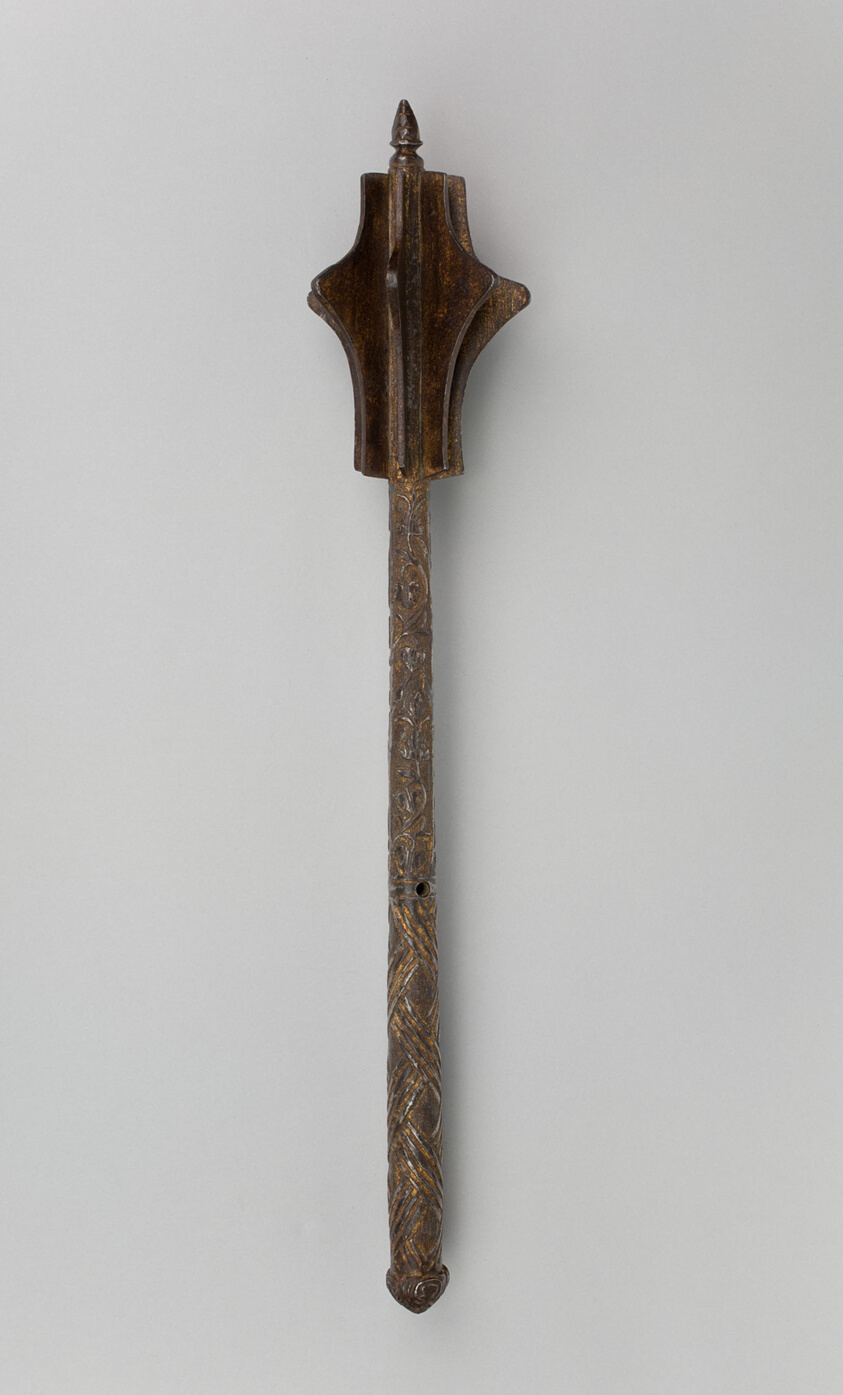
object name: Arms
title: Mace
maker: Italian, possiblly Spanish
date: 1530/50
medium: Steel, iron, and gilding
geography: Italy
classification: shafted weapon; arms; arms and armor